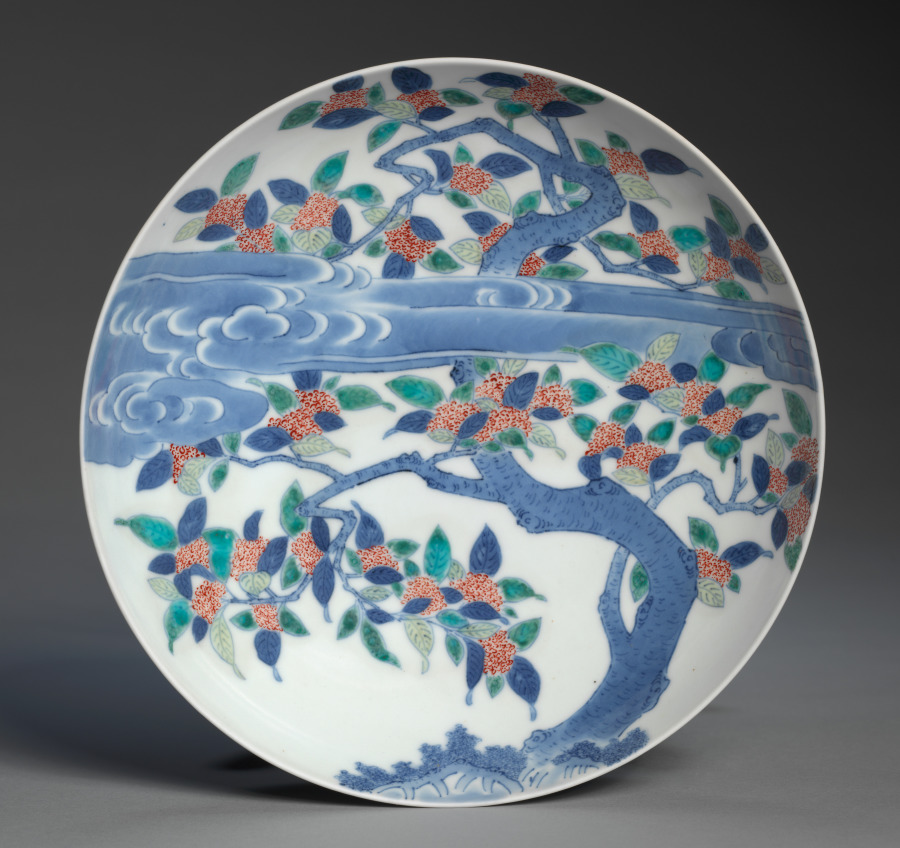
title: Dish with Sweet Osmanthus and Cloud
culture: Japan, Edo period (1615–1868)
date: late 1600s–early 1700s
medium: Porcelain with underglaze blue and overglaze color enamel (Hizen ware, Nabeshima type)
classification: Ceramic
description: The dish is an example of the finest type of early Japanese porcelain, Nabeshima-type Hizen ware. It is decorated with sweet osmanthus, or fragrant olive tree, with iron-red flowers and green and yellow enamels on the leaves. A band of misty clouds in underglaze blue completes the composition. The osmanthus tree was imported from China to southern Japan.